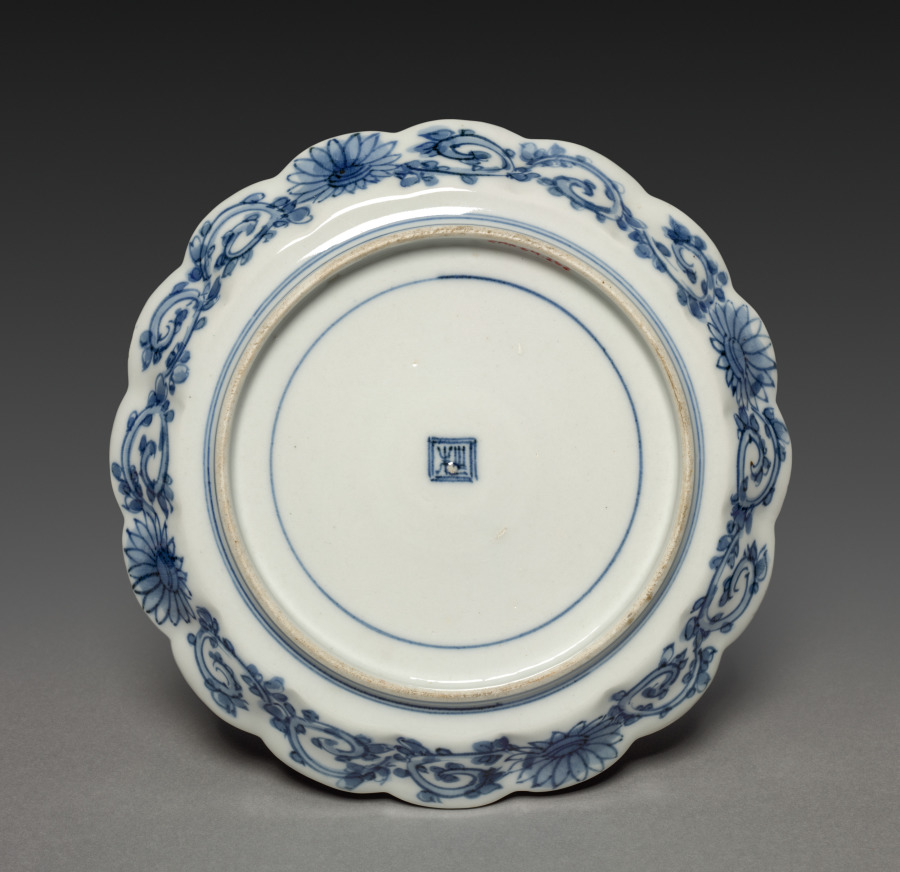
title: Dish with Singing Bird on a Rock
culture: Japan, Edo period (1615–1868)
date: 1700s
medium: porcelain with underglaze blue and overglaze color enamel (Hizen ware, Ko-Kutani style)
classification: Ceramic